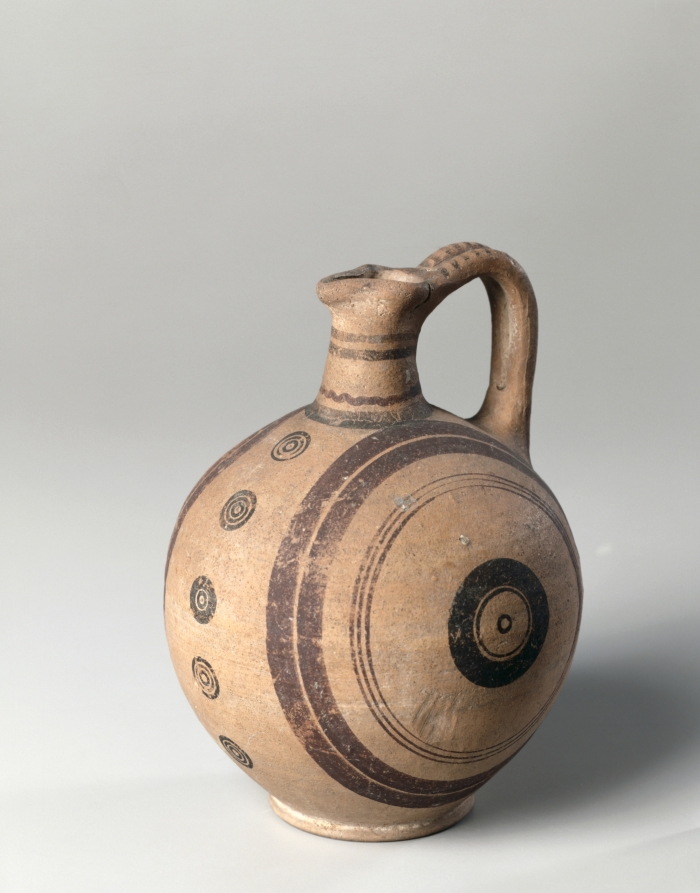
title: Jug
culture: Cyprus, Cypro-Archaic II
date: c. 600–475 BCE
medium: white painted ware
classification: Ceramic